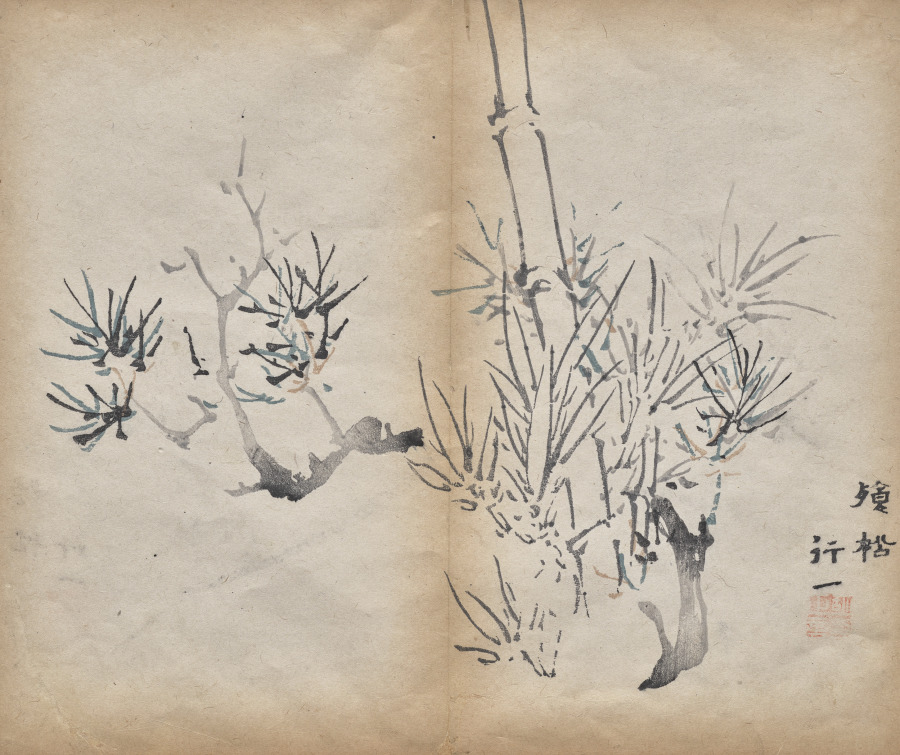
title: Bamboo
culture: China, Ming dynasty (1368–1644)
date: 1625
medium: color woodblock print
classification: Print